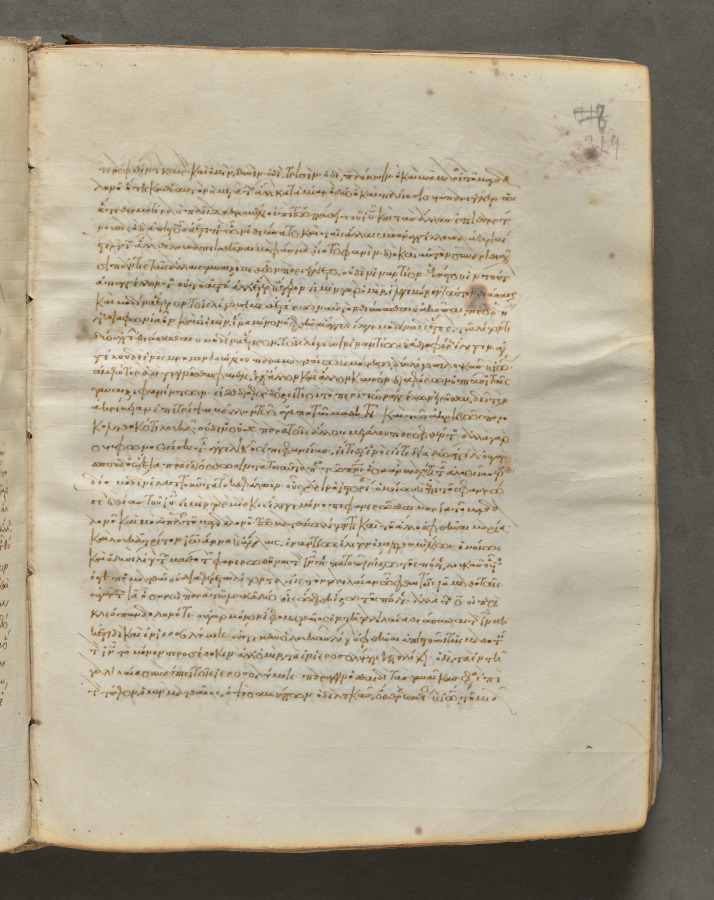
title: Text, folio 319 (recto), from a Gospel Book with Commentaries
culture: Byzantium, Constantinople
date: c. 1000–1100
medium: ink, tempera, and gold on vellum; leather binding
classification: Bound Volume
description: Each of the four gospels in this book opens on a page with brilliantly illuminated borders depicting the author of the text as well as birds—principally peacocks, symbols of the immortality of the soul—and fountains, representing the fountain of life and the salvation of the soul. This volume consists of 428 leaves with texts in Greek. Its level of sophistication suggests that it was probably written and decorated in a monastery in Constantinople.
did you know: Gospel books were carried in procession through Byzantine churches.